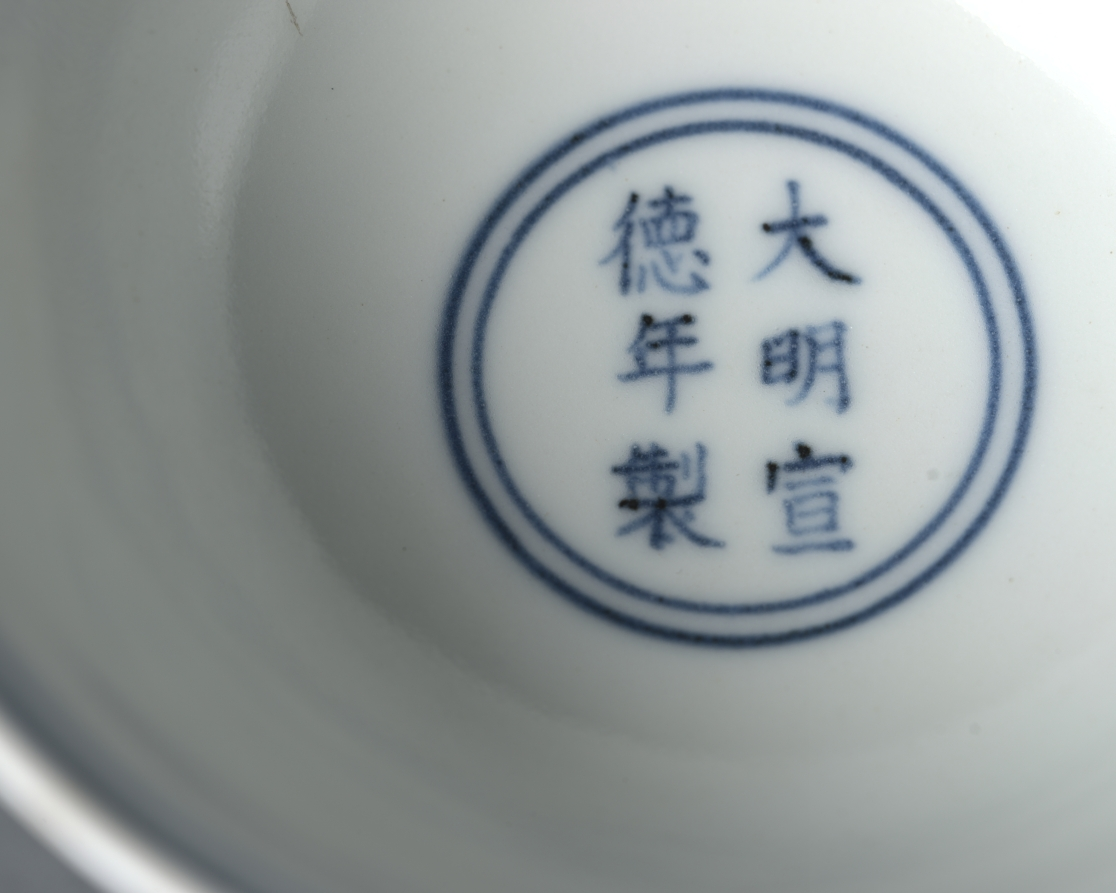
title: Stem Cup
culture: China, Jiangxi Province, Jingdezhen, Ming dynasty (1368–1644), Xuande mark and period (1426–35)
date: 1426–35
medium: porcelain with underglaze blue and overglaze red enamel decoration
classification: Ceramic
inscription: 大明宣德年製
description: These two Ming imperial wares [CMA 1957.60 and CMA 1957.61] are among the smallest, but most precious, of the museum's holdings in Chinese ceramics. The luminous glaze, gestural freedom, and vibrant color are perfectly unified to fit the delicate shapes of these luxury items.